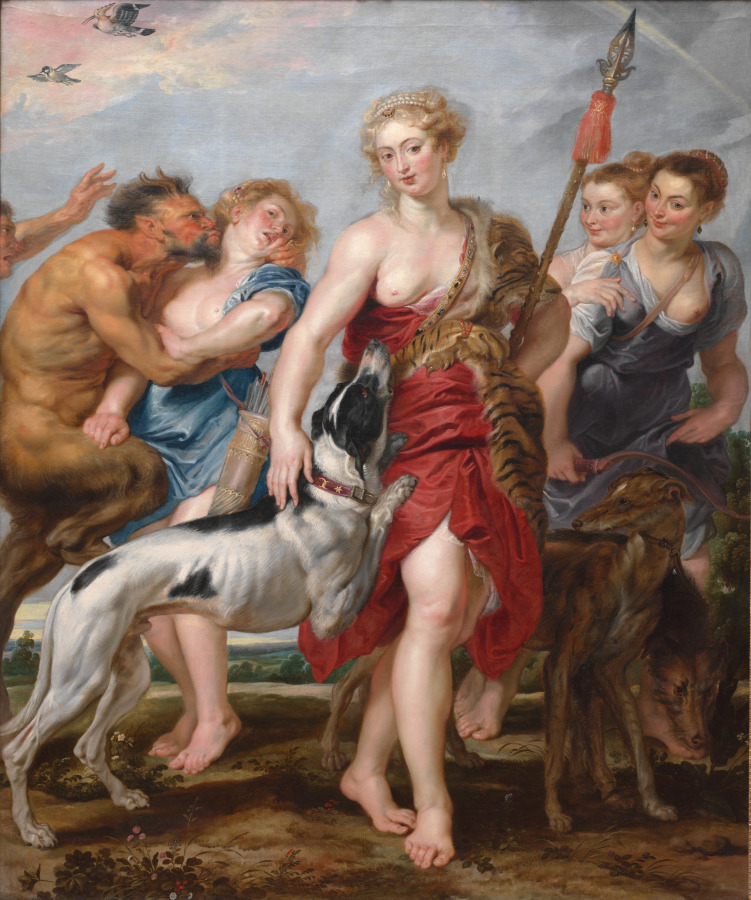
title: Diana and Her Nymphs Departing for the Hunt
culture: Flanders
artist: Peter Paul Rubens (Flemish, 1577–1640)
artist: and Workshop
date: c. 1615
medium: oil on canvas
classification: Painting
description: Diana, the Roman goddess of the hunt, wears a crescent on her forehead, also identifying her as the moon goddess. Diana lived apart from men, accompanied by a group of nymphs; she often represented unattainable beauty or chastity. With a nymph at left fending off a lustful satyr, Rubens refers to a struggle between vice and virtue, combining a sensual display of female bodies with a moral undertone. To bring the viewer more fully into the narrative, Rubens pulls the full-bodied figures to the front of the picture plane, and Diana steps forward, activating the space between viewer and subject. The nymph at the right has the features of Isabella Brant, the artist’s wife, and can be compared with Rubens’s portrait of her, also in the museum's collection.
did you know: The moon and stars on the white and black dog’s collar indicate that both hounds are companions of Diana, accompanying the goddess on her hunts.